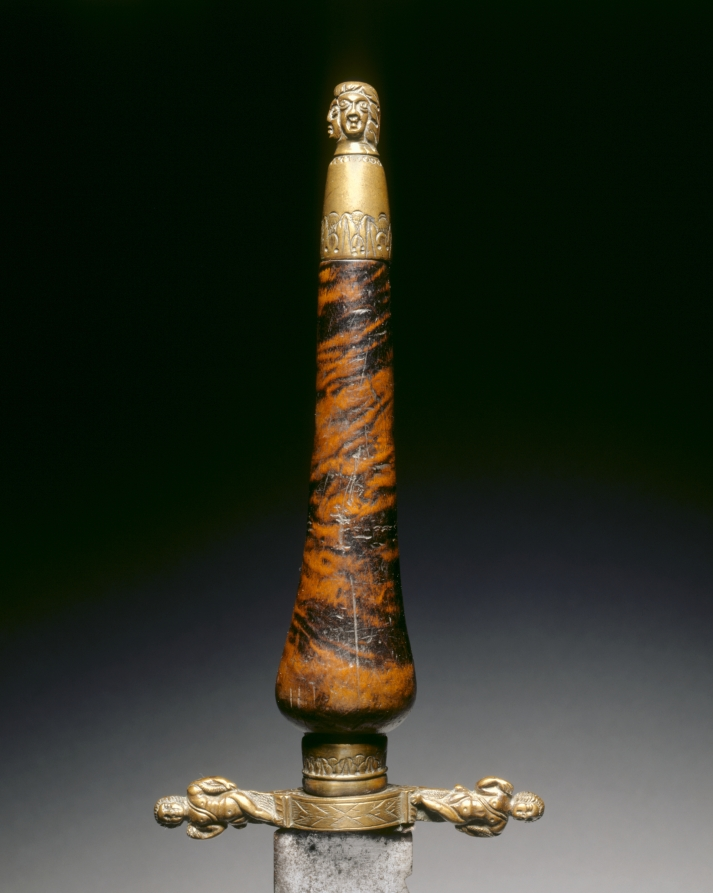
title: Officer's Plug Bayonette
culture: England, 17th century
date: c.1690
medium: steel serrated blade, brass, and wood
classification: Arms and Armor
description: Used increasingly in warfare during the 1600s, the plug bayonet was inserted into the muzzle of a gun to make a weapon with a long shaft. This eventually made the use of pikemen in warfare obsolete as the new musketeer could now continue after having run out of shots.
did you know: The owner's or maker's mark on this blade is unidentified.